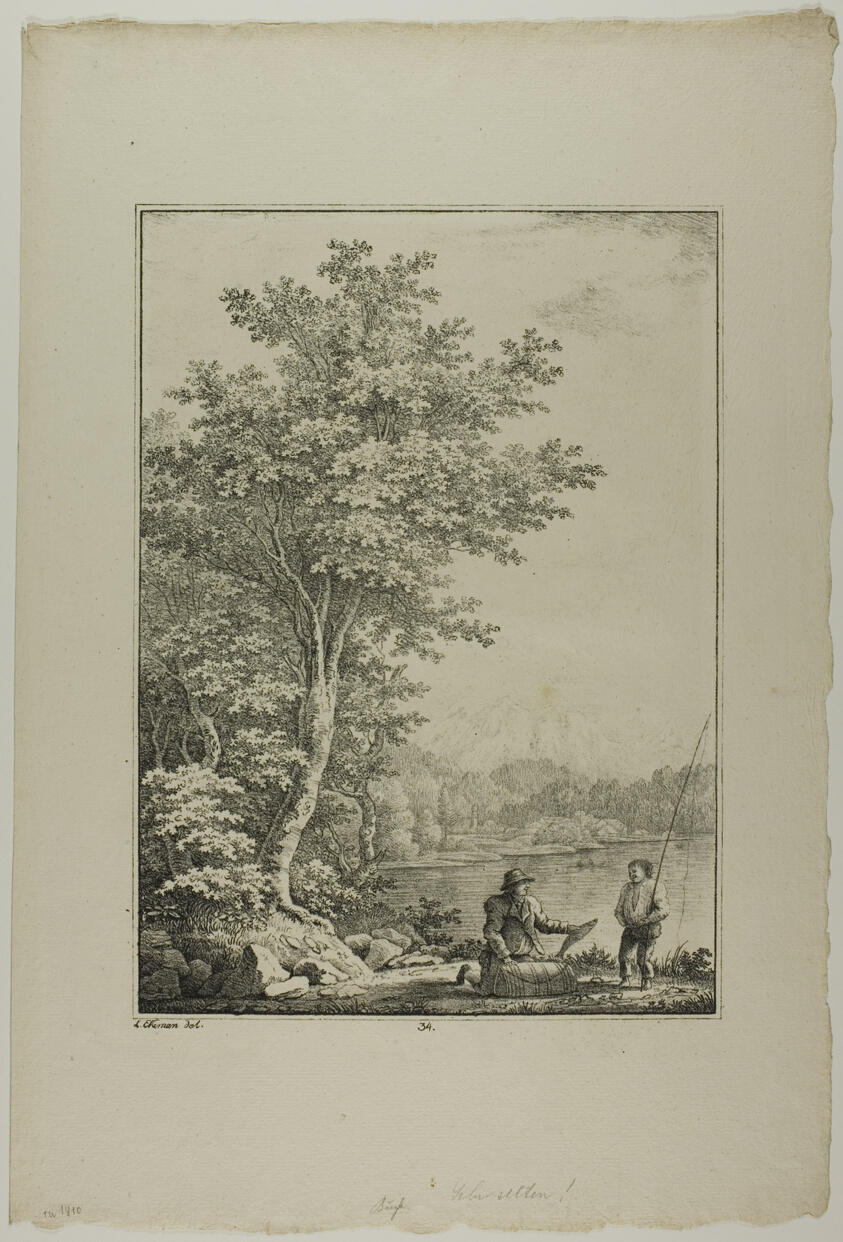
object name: Print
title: Plate 34 from Blatt Baum und Landschafts Studien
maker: Lorenz Ekemann Alesson (Swedish, 1791-1828)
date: c. 1810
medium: Lithograph on paper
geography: Sweden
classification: lithograph; print; prints and drawing